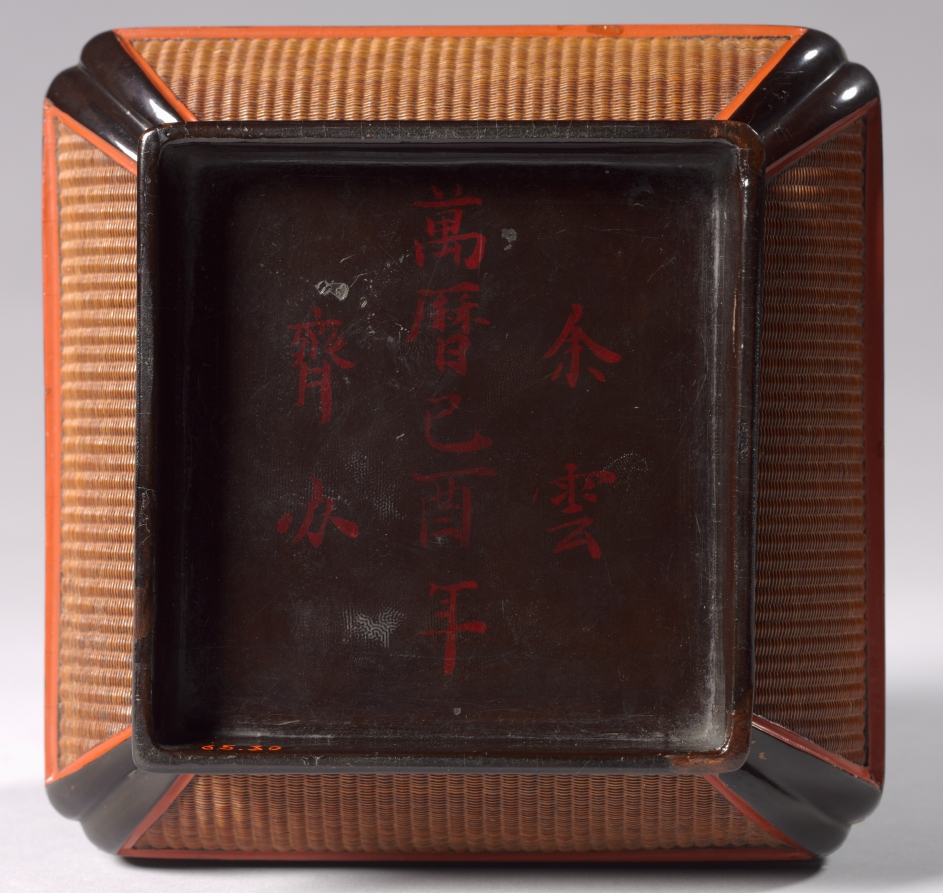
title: Wickerwork Box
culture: China, Ming dynasty (1368-1644), Wanli reign (1572-1620)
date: 1609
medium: lacquered wickerwork (of woven bamboo) framed in wood with circular scene inlaid in mother-of-pearl and gold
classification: Lacquer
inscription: Inscription at bottom in red on black lacquer reads: "commissioned by Yü-Yün-ch'i".